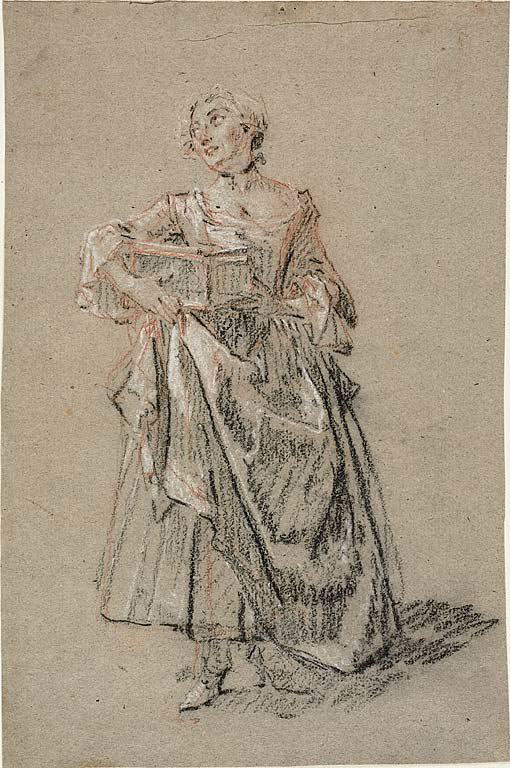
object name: Drawing and Watercolor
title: Study of a Woman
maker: Nicolas Lancret (French, 1690-1743)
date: c. 1743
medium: Black and red chalk, heightened with white chalk, on tannish-gray laid paper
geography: France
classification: chalk; drawings (visual works); prints and drawing